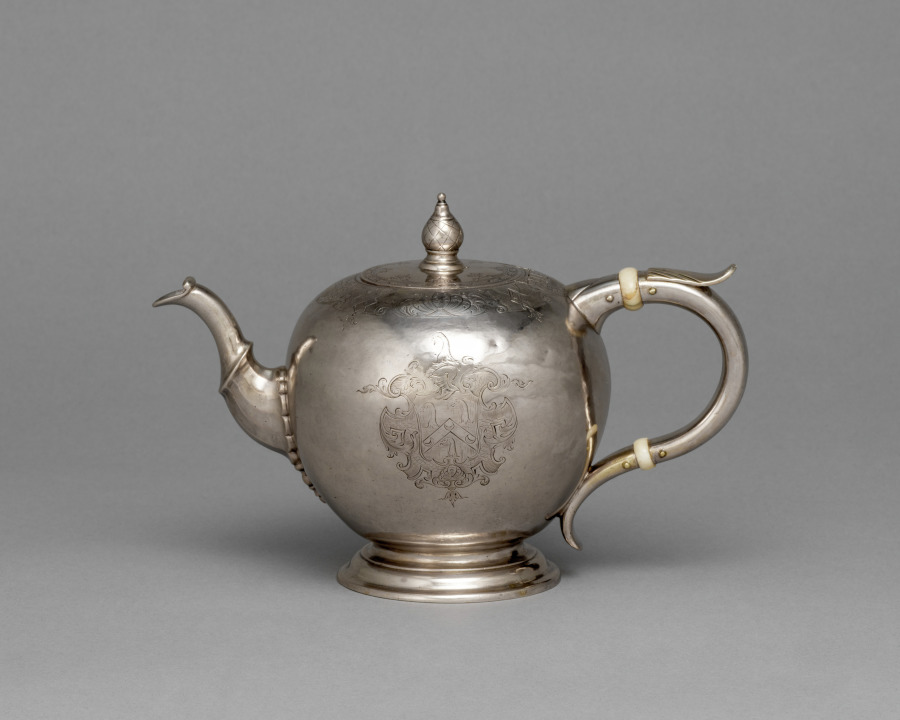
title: Teapot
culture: America, Massachusetts, Boston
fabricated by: Jacob Hurd (American, 1702–1758)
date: c. 1740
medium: silver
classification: Silver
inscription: engraved coat of arms of Whipple.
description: This teapot was made by Jacob Hurd, the father of Nathaniel Hurd whose portrait by John Singleton Copley is in gallery 204. The finial is probably not original to this teapot.